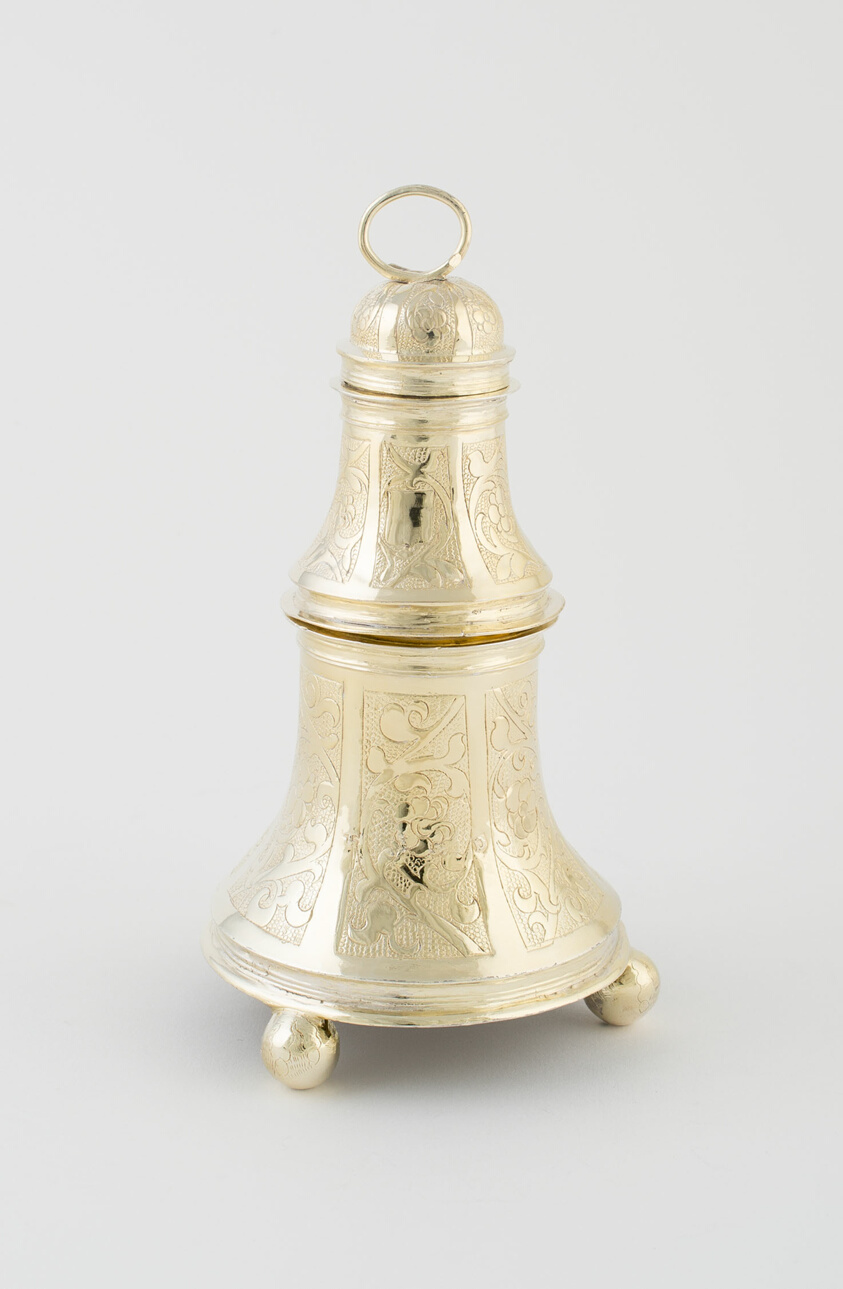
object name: Metalwork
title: Bell Salt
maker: London, England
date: 1601/02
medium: Silver gilt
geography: London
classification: silver; metalwork; european decorative arts